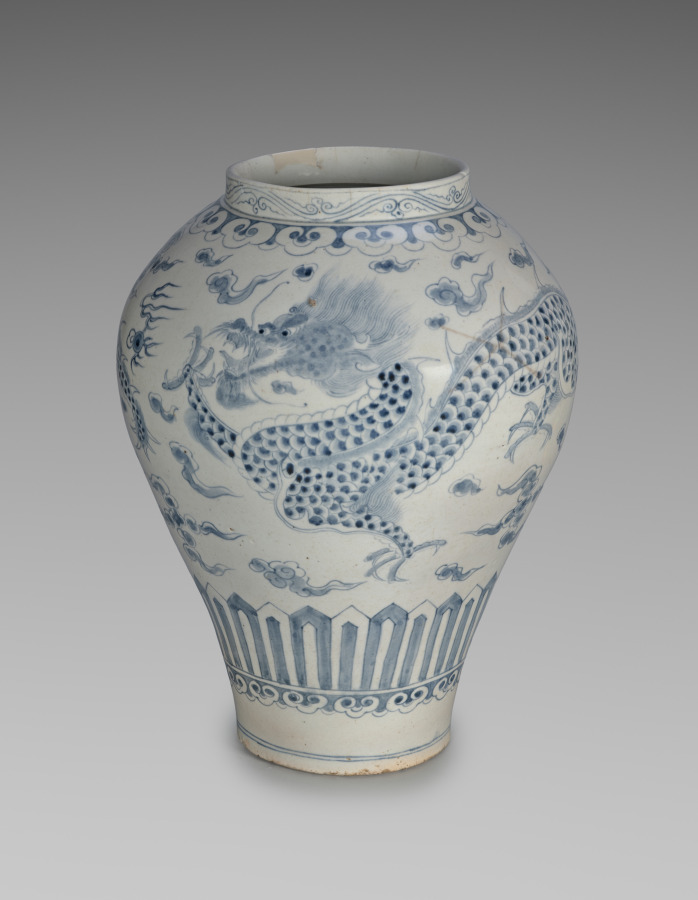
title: Jar with Dragon Design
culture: Korea, Joseon dynasty (1392–1910)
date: 1700s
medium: porcelain with underglaze blue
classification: Ceramic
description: As a mythical creature believed to make rain, the dragon served as a symbol of rulers in premodern East Asia. Here, a cobalt blue dragon is depicted flying through clouds to catch a flaming, wish-granting jewel called a cintamani. In the royal court, the shorter type of dragon jar held wine, while the tall type, like this one, held flowers. This porcelain once belonged to Robert W. Moore, who developed an interest in Korean art while serving in the US Army in South Korea during the 1950s and 1960s. Later, the CMA acquired this important work through an auction sale in 1986.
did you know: A mythical creature believed to have the power to make rain, the dragon is a prominent symbol of rulers in premodern East Asia; the image of dragons was used exclusively for the king's paraphernalia.